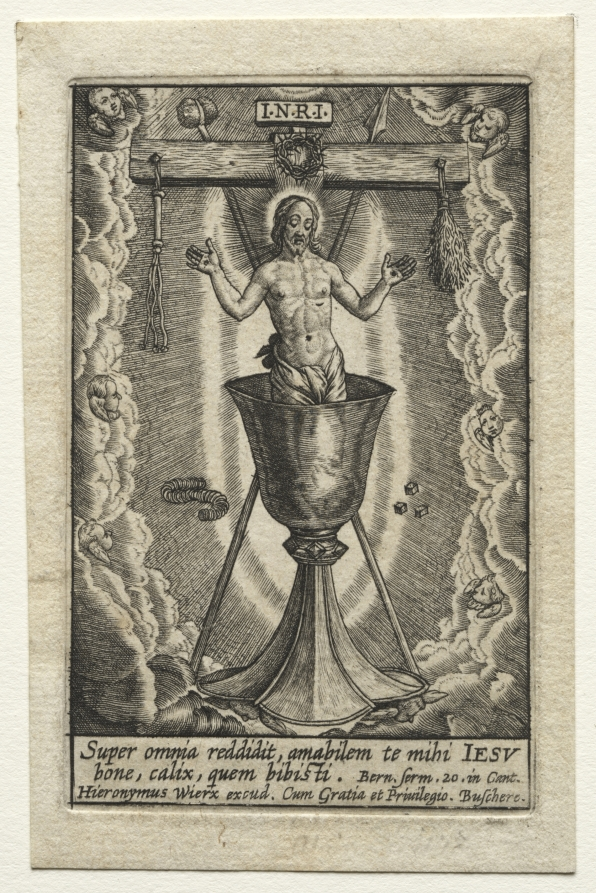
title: The Blood of the Redeemer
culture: Flanders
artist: Hieronymus Wierix (Flemish, 1553–1619)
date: before 1619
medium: engraving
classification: Print